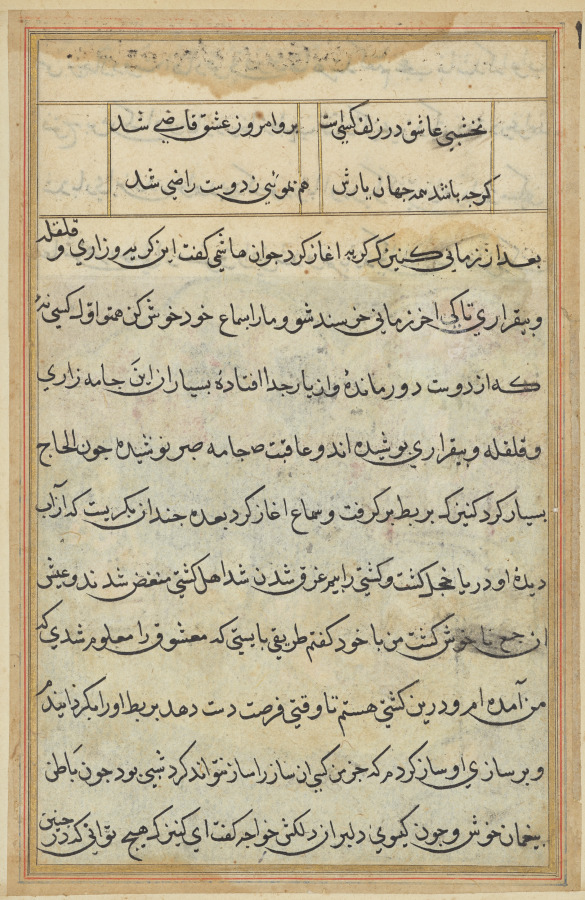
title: Page from Tales of a Parrot (Tuti-nama): text page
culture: Mughal India, court of Akbar (reigned 1556–1605)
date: c. 1560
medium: gum tempera, ink, and gold on paper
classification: Painting